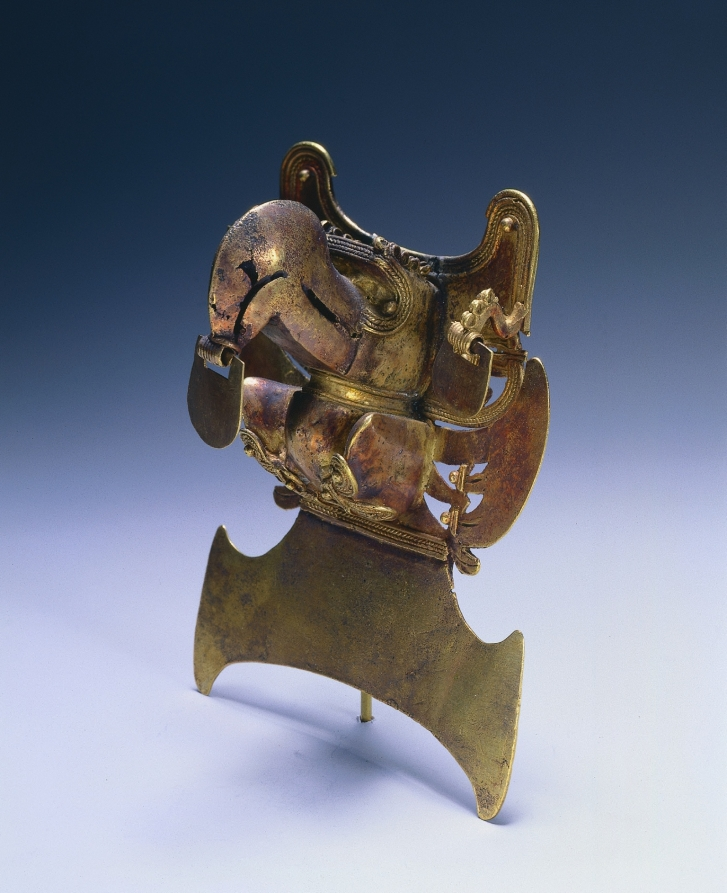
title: Bird Pendant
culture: Colombia, Tairona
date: 900–1550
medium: cast gold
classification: Metalwork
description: Tairona-style pendants are among the most spectacular of all ancient American gold ornaments, in part because of the detail achieved with lost-wax casting. The traits of the figure pendant include a lower lip ornament and a headdress in which two bats hang upside down. Although called caciques (chieftains), that is, ruler portraits, the meaning of such figures is not well understood. Bird imagery was important in the isthmian region in ancient times and remains so today. For instance, among the modern Bribri of Costa Rica, the principal creator deity (Sibo) takes the form of a buzzard or kite who wears a collar. Collars are standard features of ancient bird pendants, like the one shown here.